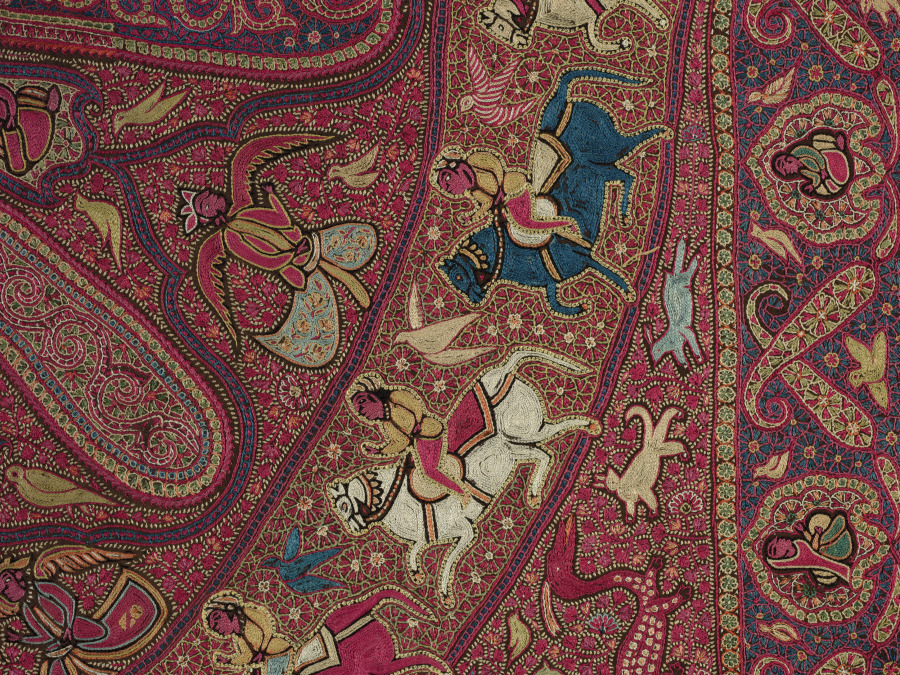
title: Square Shawl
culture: India, Kashmir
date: c. 1850–70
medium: Silk and silver filé, wool: chain stitch embroidery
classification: Embroidery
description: By the 1800s, the Himalayan foothill region of Kashmir was renowned for distinctive embroideries, and Kashmiri shawls were coveted by women throughout the British Empire. The center of this square shawl is in the form of an eight-petaled lotus, a symbol for the sun, and around it are the elongated forms of slender cypress trees, which became the inspiration for paisley. Every space is populated with figures: seated, standing, male, female, or playing musical instruments. Others are winged heavenly figures called peri. Birds are the only animals in these central spaces, suggesting a heavenly realm. In the next concentric ring riders in an equestrian procession alternate with flying birds. In the spandrels, the triangular sections between the circle and the square, are gatherings under a tent with animals. Some local Himalayan animals can be identified, such as the spotted snow leopard and the snake-eating markhor goat.